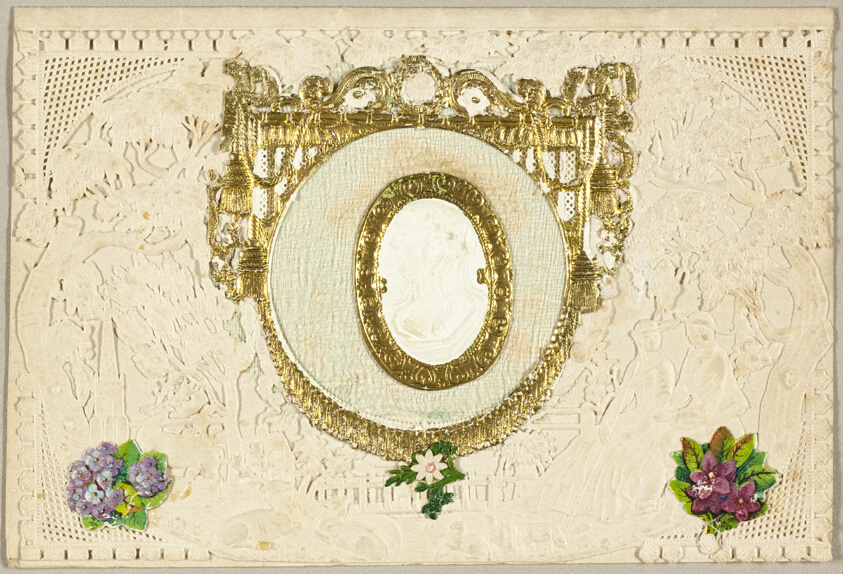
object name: Drawing and Watercolor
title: Untitled Valentine (Woman in Profile)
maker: John Windsor (English, 19th century)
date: 1860/69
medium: Collaged elements and gold paint on cut and embossed (designed) ivory wove paper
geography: England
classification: collage; valentine; prints and drawing; paper